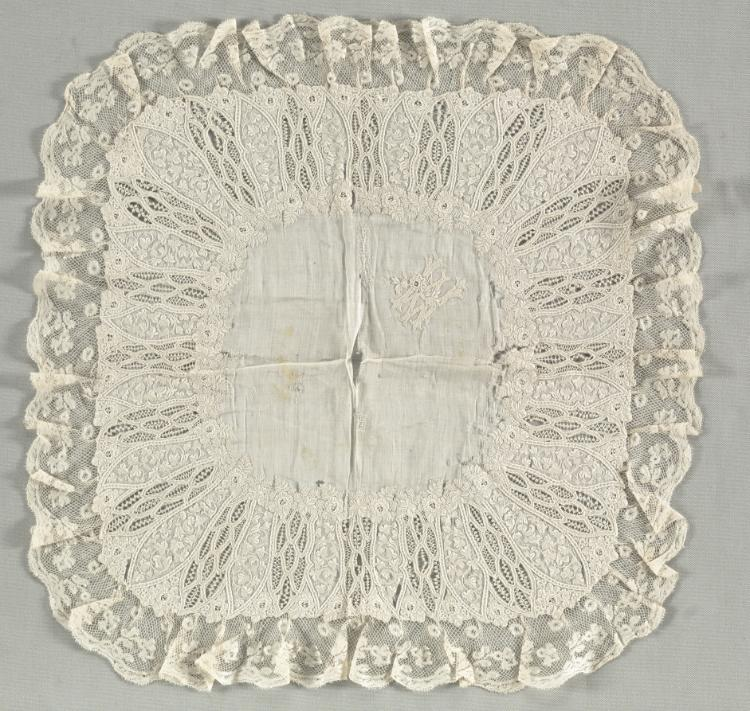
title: Lace Handkerchief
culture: France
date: 1700s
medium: plain weave center; bobbin lace border and embroidery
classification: Embroidery